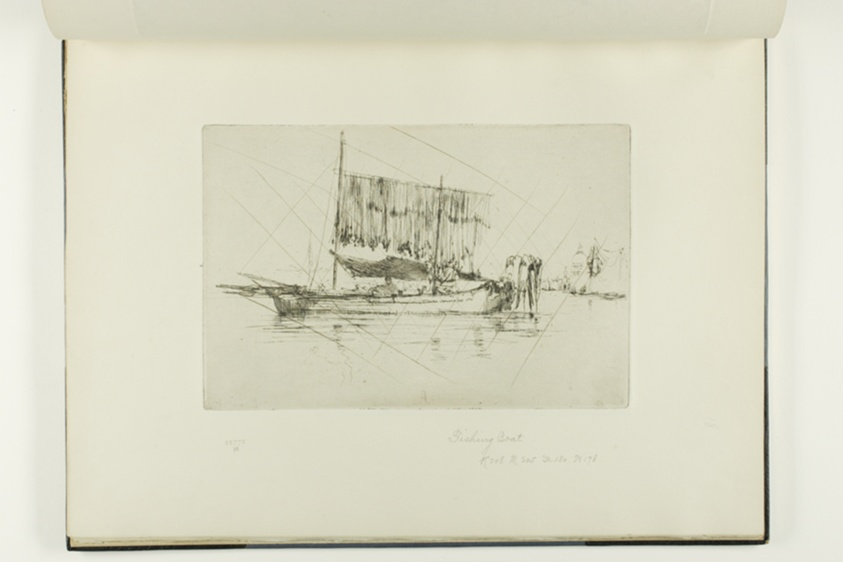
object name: Print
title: The Fishing Boat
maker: James McNeill Whistler (American, 1834-1903)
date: 1879/80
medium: Etching and drypoint with foul biting, with drypoint cancellation, in black ink on ivory laid paper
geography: United States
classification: etching; print; prints and drawing; foul biting; drypoint; book; paper